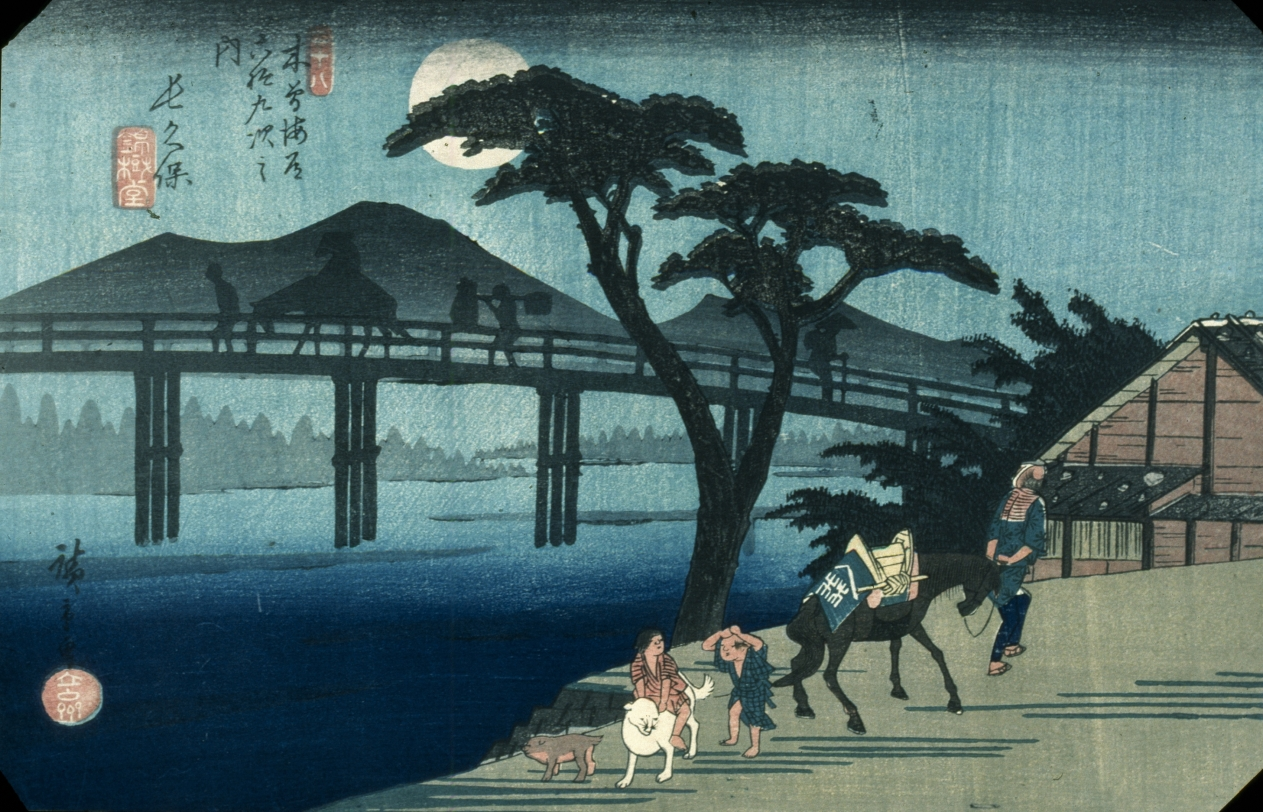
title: Nagakubo (Station 28) from the series Sixty-Nine Stations of the Kisokaido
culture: Japan, Edo period (1615–1868)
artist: Utagawa Hiroshige (Japanese, 1797–1858)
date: 1835 or 1836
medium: color woodblock print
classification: Print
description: The inland road connecting Edo (present-day Tokyo) and Kyoto, the Kisokaidō had 69 post stations, similar to contemporary freeway rest areas. These prints of the mountainous Kisokaidō offered urban print collectors views of scenic spots without the inconveniences of travel. Moonlight silhouettes travelers leaving the Nagakubo station, while a figure with a walking stick approaches it across the Wada Bridge. In the foreground, a man leading his weary horse gazes at the moon while children play with dogs.